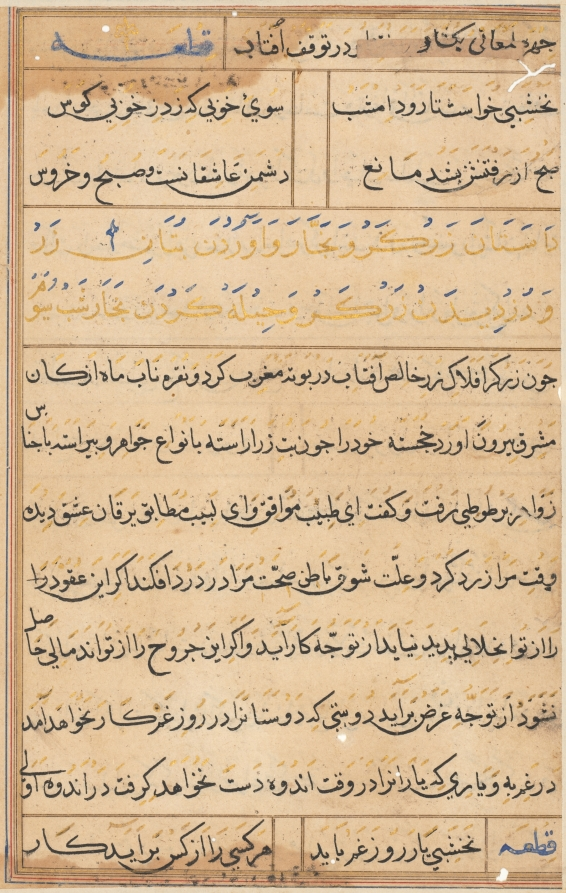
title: Page from Tales of a Parrot (Tuti-nama): text page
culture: Mughal India, court of Akbar (reigned 1556–1605)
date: c. 1560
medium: gum tempera, ink, and gold on paper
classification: Painting